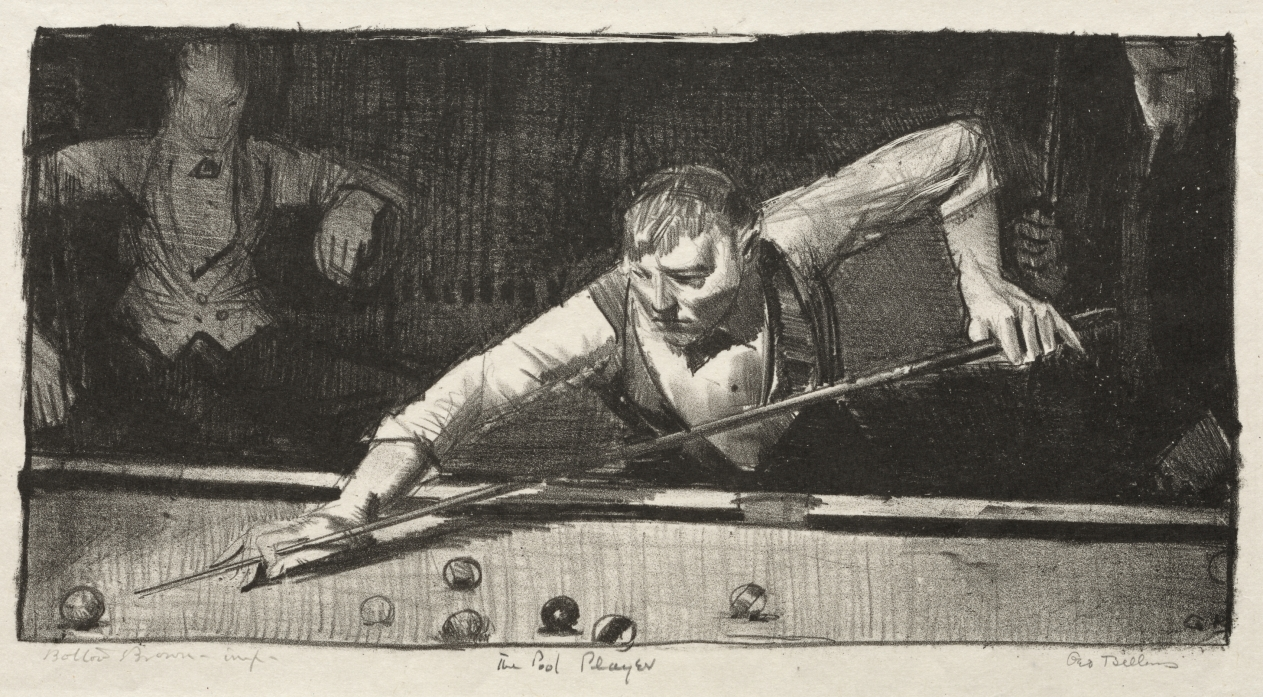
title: The Pool Player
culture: America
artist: George Bellows (American, 1882–1925)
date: 1921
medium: lithograph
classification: Print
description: A single overhead light illuminates the pool player’s careful concentration and agile pose while casting two rapt companions in shadow. The figure on the left is believed to be Bellows’s self-portrait.